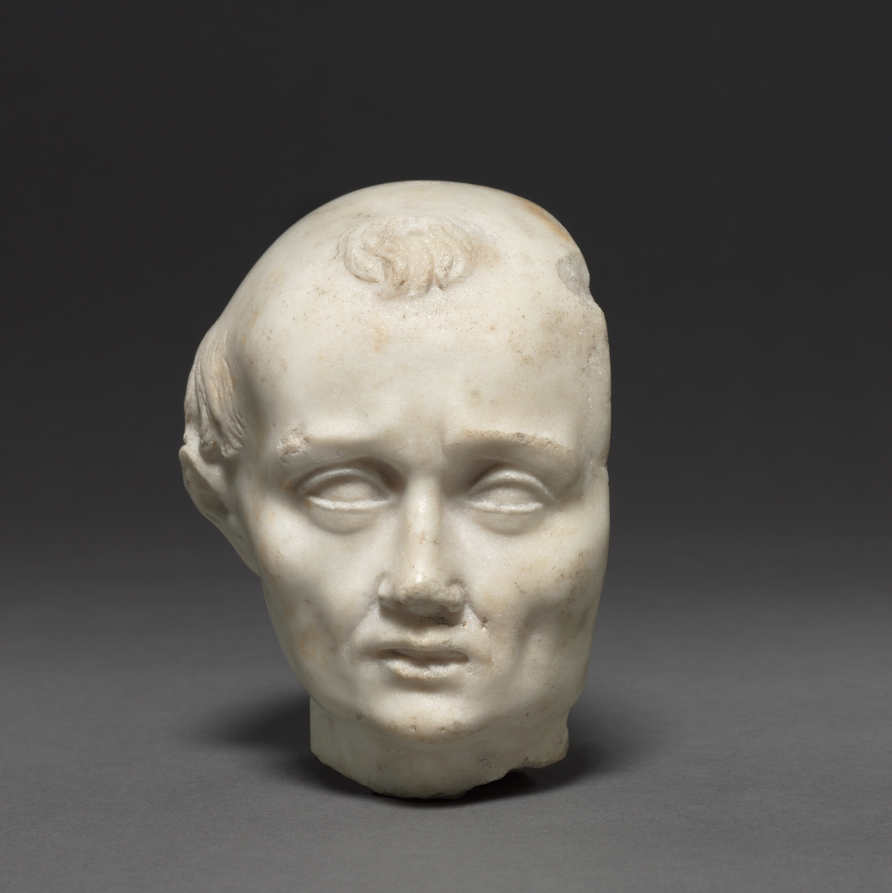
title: Head of a Man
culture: France, 15th century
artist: circle of Michel Colombe (French, c. 1430–c. 1513)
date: 1520–1525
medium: marble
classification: Sculpture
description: The original context and function of these two marble heads are unknown. They are presumed to have been part of a relief sculpture from a château, perhaps in the Loire region, or else from a tomb sculpture. Their style is reminiscent of sculptures produced by Michel Colombe, a prominent sculptor active in the Loire Valley in the service of aristocratic and royal patrons, and may have been carved by a close follower or member of his workshop.